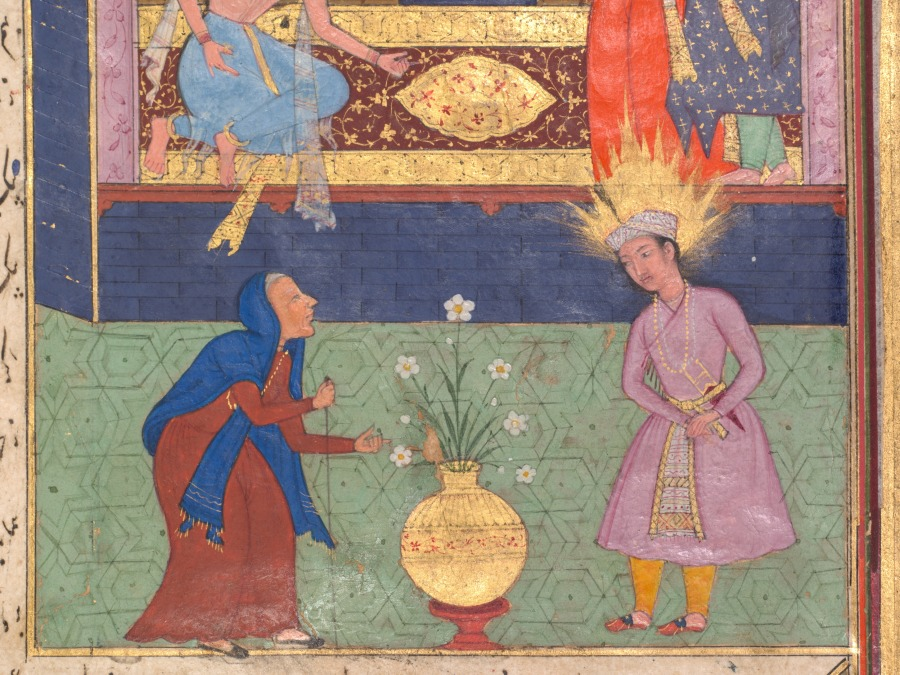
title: Zulaykha in her palace and as an elderly woman with Joseph (recto), from a Panj Ganj (Five Treasures) of Abd al- Rahman Jami (Persian, 1414–1492)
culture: Western Afghanistan, Herat (text); Mughal India (paintings)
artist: Mushfiq (Indian, active early 1600s)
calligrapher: Sultan 'Ali al-Mashadi (Iranian, 1430–1520)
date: 1603–7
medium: Gum tempera, ink, and gold on paper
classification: Painting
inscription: [[Upper left of painting, against a red background, in nasta’liq script]] ' amal - i Mushfiq sana 1015 Text on verso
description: The golden pot of white narcissus flowers at the bottom center of the painting signals that Zulaykha, leaning on her staff to the left, will imminently have her youth and beauty restored. In this Persian retelling of the Old Testament account from the Bible, Zulaykha lusted after Joseph, even though she was already married to Potiphar. Joseph, with the golden halo, resisted her advances until she became a widow and retained his youth, because of his extreme virtue. Above, Zulaykha as a young woman waits for Joseph in her house where murals of them as a happy couple are painted on the walls.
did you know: Zulaykha is shown four times: twice in the murals, seated in the center, and below when she is much older.